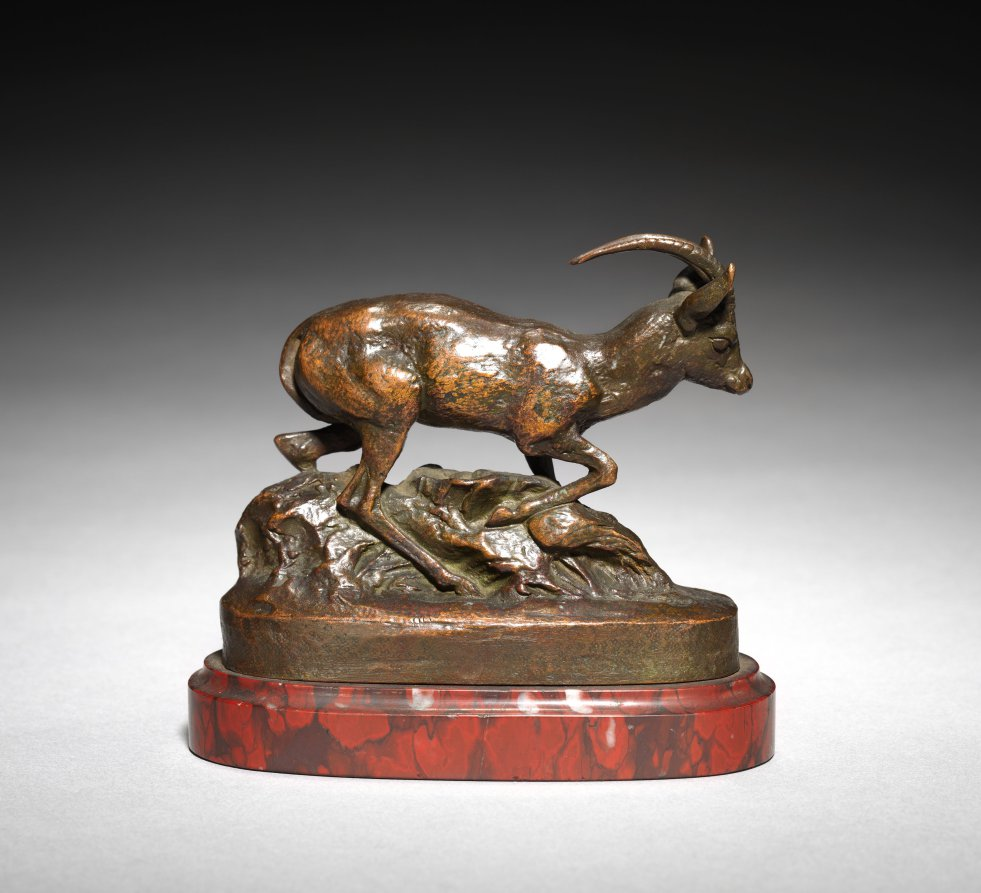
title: Gazelle d'Ethiopie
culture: France, 19th century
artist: Antoine-Louis Barye (French, 1796–1875)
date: 1887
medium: bronze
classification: Sculpture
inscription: Signed: "Barye 1887 Gazelle d'Ethiopie"